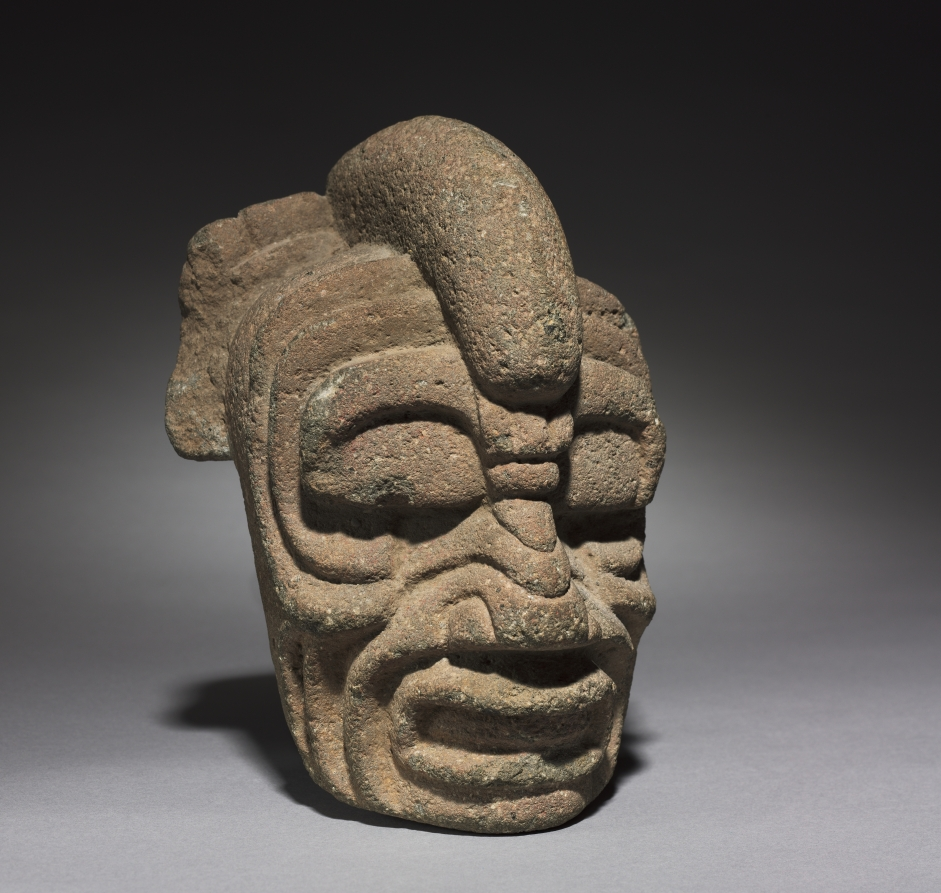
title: Ballgame Stone Head (Hacha)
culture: Mesoamerica, Classic Veracruz style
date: 450–550 CE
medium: gray volcanic stone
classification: Sculpture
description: Little can be said about this head’s identity and meaning, although the deep, dramatic furrows that line the face suggest age and the crest that curves across the top of the head has been compared to that of a bird. Such heads were one element of the regalia used in an ancient ballgame associated with complex mythology and equally elaborate art production on Mexico’s Gulf Coast, in present-day Veracruz.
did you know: This head’s identity is unknown but the deep furrows on the face suggest age.